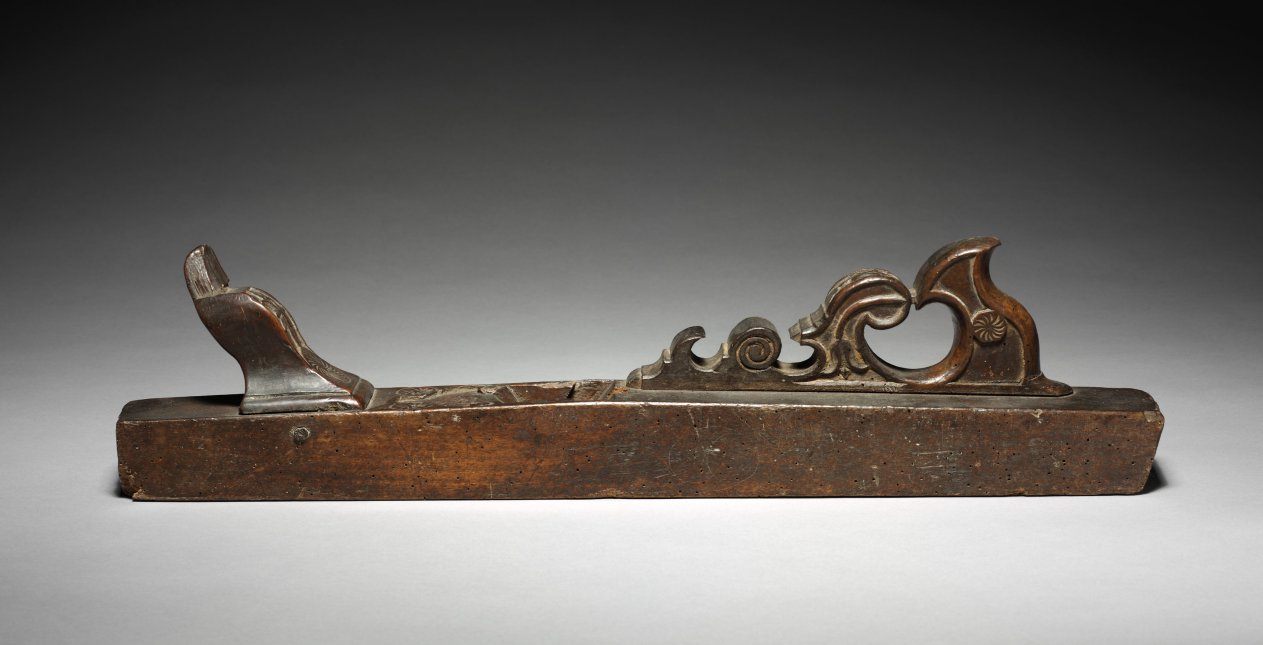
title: Carpenter's Plane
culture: Italy, early 17th century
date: early 1600s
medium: wood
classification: Tool